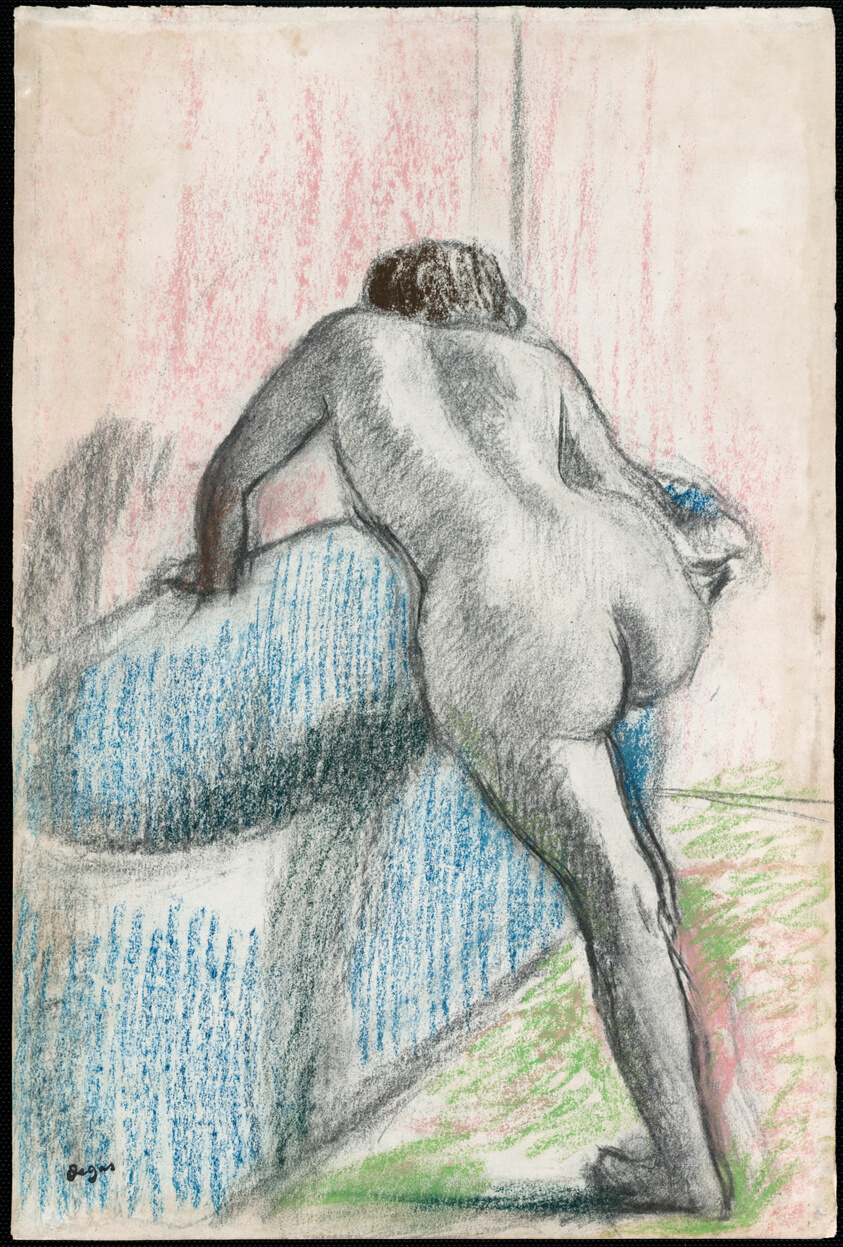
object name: Drawing and Watercolor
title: The Bath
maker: Edgar Degas; French, 1834-1917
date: 1892/95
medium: Pastel and charcoal on off-white wove paper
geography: France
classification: prints and drawing; charcoal; drawings (visual works); pastel; paper